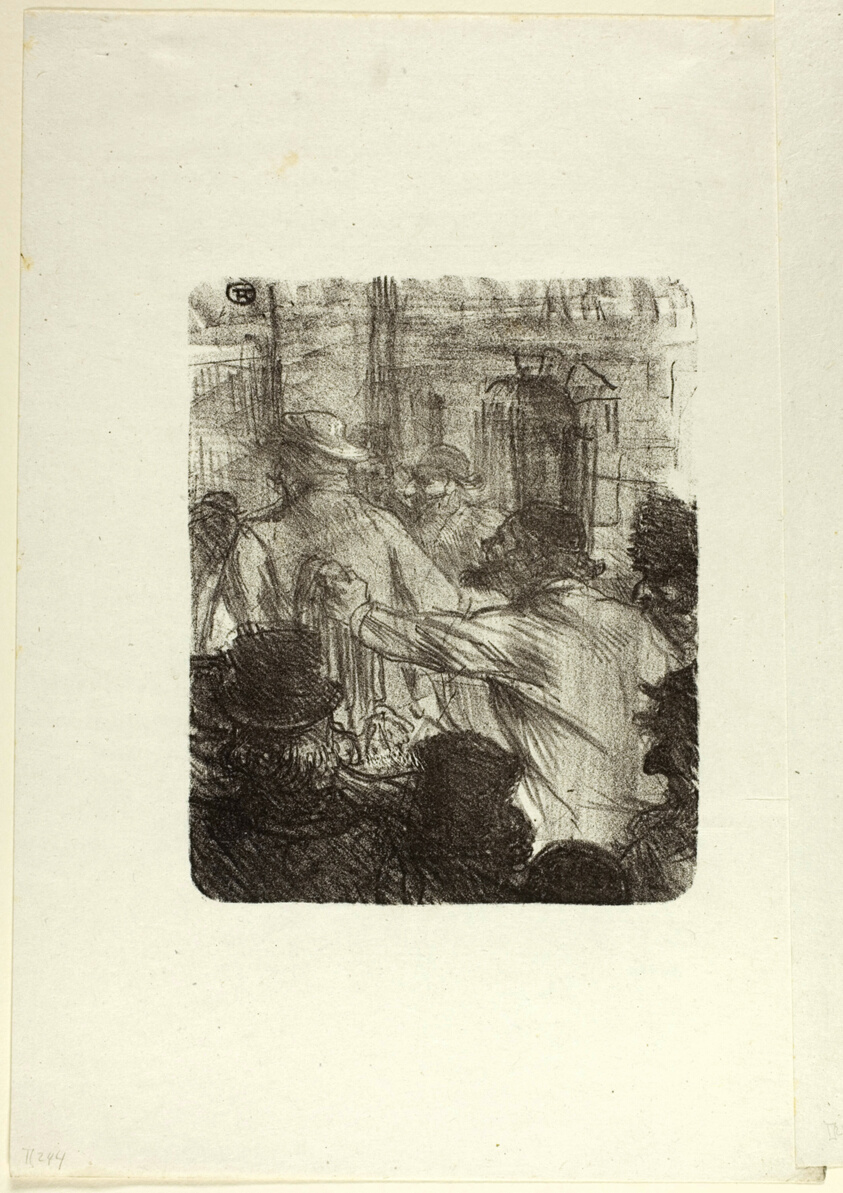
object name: Print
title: Textile Market, Cracow, from Au Pied du Sinaï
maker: Henri de Toulouse-Lautrec (French, 1864-1901)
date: 1897, published 1898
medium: Color lithograph on ivory wove paper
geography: France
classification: lithograph; print; prints and drawing